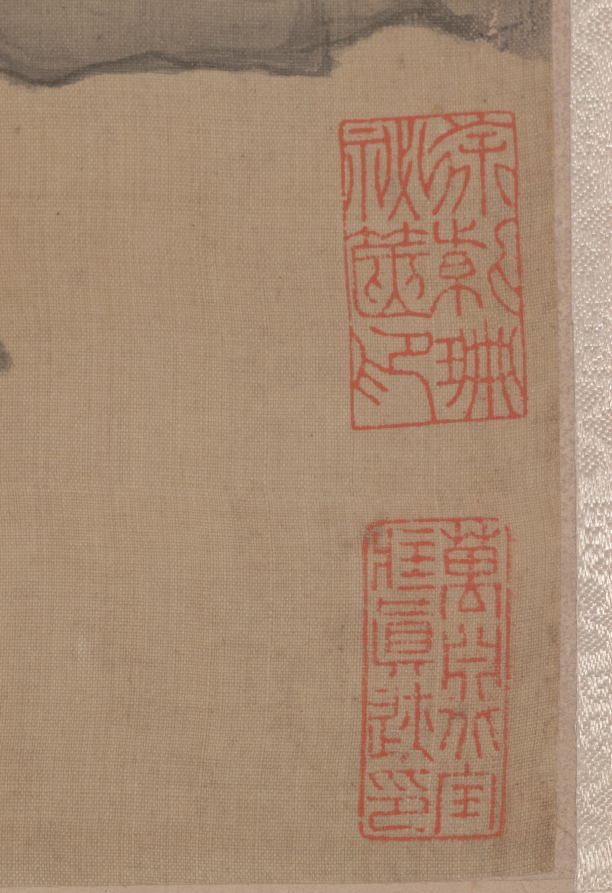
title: Lady Xuanwen Giving Instruction on the Rites of Zhou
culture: China, Ming dynasty (1368–1644)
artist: Chen Hongshou (Chinese, 1598/99–1652)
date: 1638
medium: Hanging scroll; ink and color on silk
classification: Painting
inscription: 宣文君者韋逞母宋氏也。父授以周官音義，曰：吾家世學傳周官。傳業相繼。此又周公所製，經紀〔典〕誥百官品物備於此矣。女可受之。君諷誦不輟。石帝徙山東。君乃推鹿車，背負父所授書到冀州。逞時年少。晝則採樵，夜則教逞。逞遂學成名立。仕符堅為太常。堅常幸其太學，問博士經典。乃憫禮樂遺缺。時博士盧壺對曰：廢學既久，書傳零落。比年綴撰，正經粗集。惟周官、禮經，未有其師。竊見太常韋逞母宋氏世學家，女傳其父業。得周官音義。今年八十。視聽無闕。非此母無可傳授後生。于是就宋氏家立講堂，置生員百二十人。隔絳紗縵而授業焉。拜宋氏爵，號為宣文君。賜侍婢十人。周官學後行于世。 崇禎戊寅八月二日，為綬姑六旬之辰。綬弟自成為姑偦。偕姑季女駱密、外孫楹、楠、楩、橒、楞、棅、孫女惠、漉酒上壽，屬綬圖寫，所以頌祝者。綬思宋母尚五胡之時，經藉屬之婦人；今太平有象，而秉杖名義者，獨綬姑爾。敬寫此圖，且厚望于弟紹焉。猶子洪綬九頓首。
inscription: 5 additional seals: 2 of Xu Weiren 徐渭仁(1788－1855); 2 of Sun Zutong 孫祖同 (1894–1937); 1 of C. C. Wang 王季遷 (1907–2003).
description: This painting by Chen Hongshou depicts the story of Xuanwen Jun, or Lady of Literary Propagation, at a venerable age, instructing young scholars on the Confucian classics. It was painted for Chen’s aunt in celebration of her 60th birthday. Chen’s painting style is archaic in the use of fine outlines and brilliant coloring with mineral pigments. In depicting the figures, he uses the “iron-wire” brush style (fine, even lines) with deliberate control. The faces are elongated and exaggerated. A few ritual bronzes lend the scene an antique flavor.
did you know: Chen Hongshou's long inscription at the top of the painting compares his virtuous aunt with the historical exemplar, Lady Xuanwen.